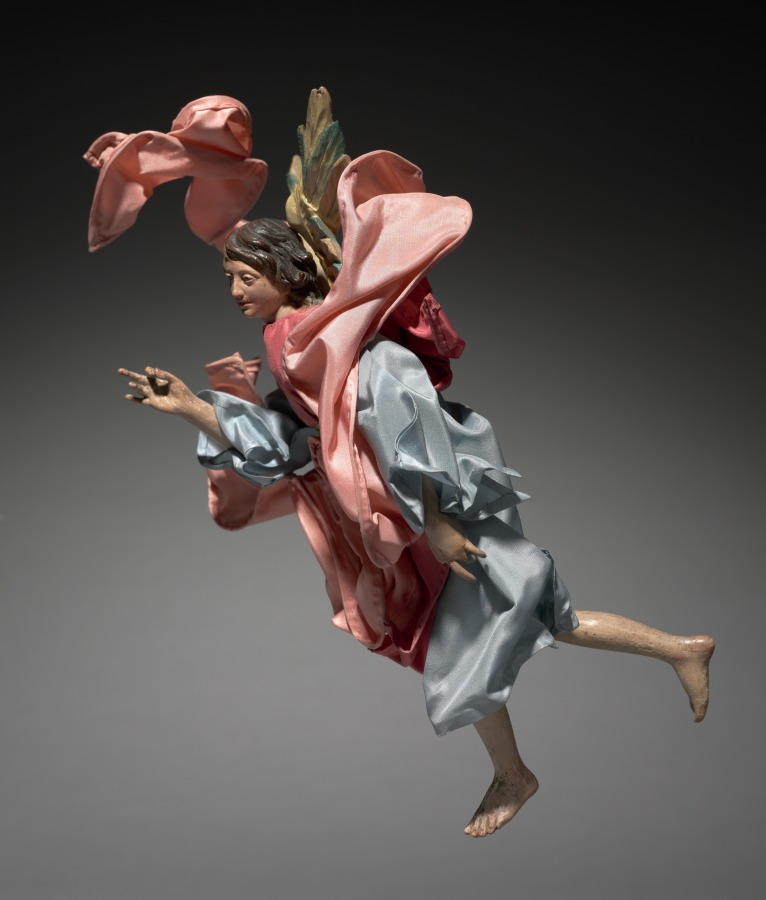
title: Figure from a Crèche: Angel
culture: Italy, Naples, late 18th-early 19th century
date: 1780–1830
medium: painted wood and terracotta with various textiles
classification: Sculpture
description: The practice of creating scenes of the Nativity for the home dates from the early 1700s in Italy, where people began to set up doll-like figures of about a foot or less in height. The custom was particularly popular in Naples around 1800, where crèche scenes (crèche means cradle, or crib) included many figures, whose heads and hands of painted terracotta, stuffed cloth bodies, and clothing adapted from contemporary local costumes gave them an amazingly realistic character. Representations of the birth of Jesus can be traced to the first few centuries of Christianity. Both living creatures and sculptural depictions of them were used from early times. By the late middle ages it was customary to create life-size figures of wood or stone, naturalistically painted, to represent the characters who participated in the events of Jesus's early life. These sculptures were then arranged in scenes illustrating one or both of the most important of these events, the Adoration of the Shepherds and the Adoration of the Magi-the three kings from the East who came to pay homage to the Christ child. Used in churches, these large figures were especially popular in Italy, Central Europe, Spain, and Portugal.